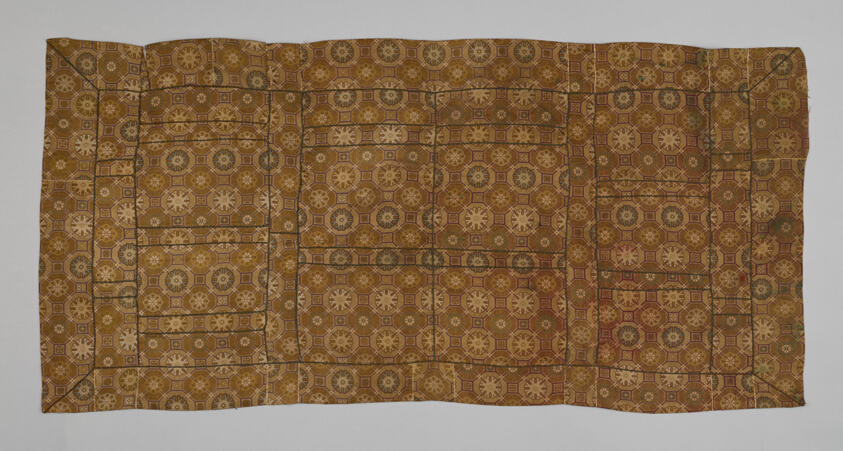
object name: Textile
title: Kesa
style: late edo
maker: Japan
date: late Edo period (1789–1868), 1799/1868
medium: Silk, warp-float faced 5:1 ‘z’ twill weave with 1:2 ‘z’ twill interlacings of secondary binding warps and supplementary patterning wefts; silk-wrapped cotton plied cords; couched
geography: Japan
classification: textile; liturgical - buddhist; weaving